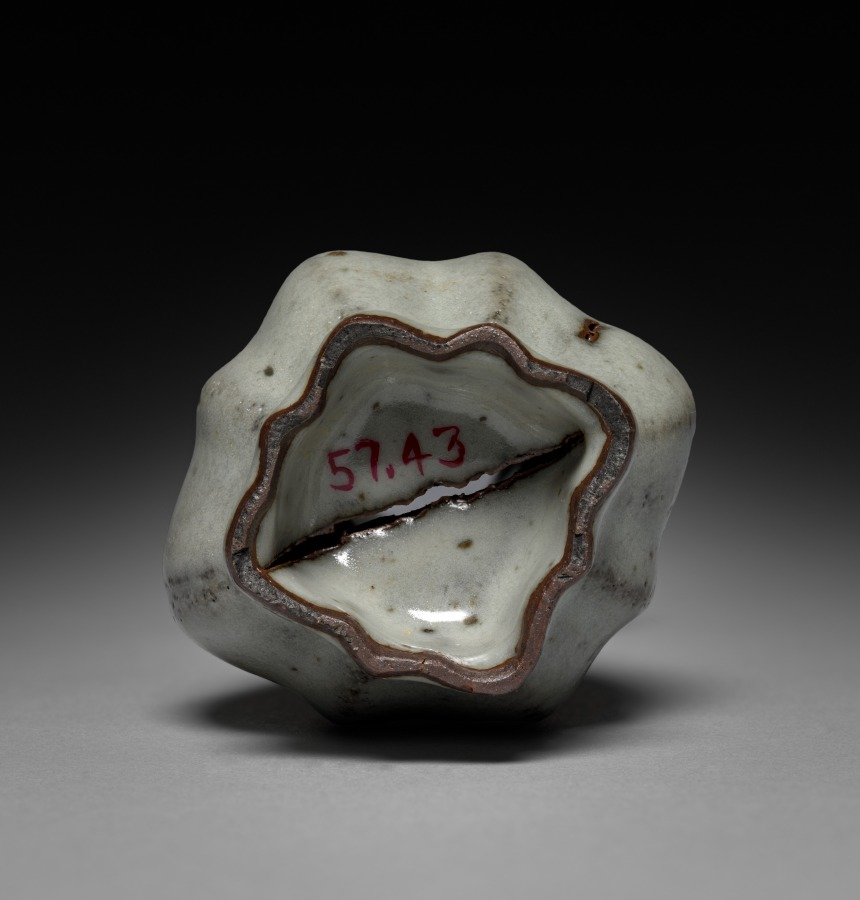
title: Lobed Vase: Guan ware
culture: China, Hangzhou, Suburban Altar Kiln, Southern Song dynasty (1127-1279)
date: 1127–1279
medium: glazed reddish-brown porcelain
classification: Ceramic